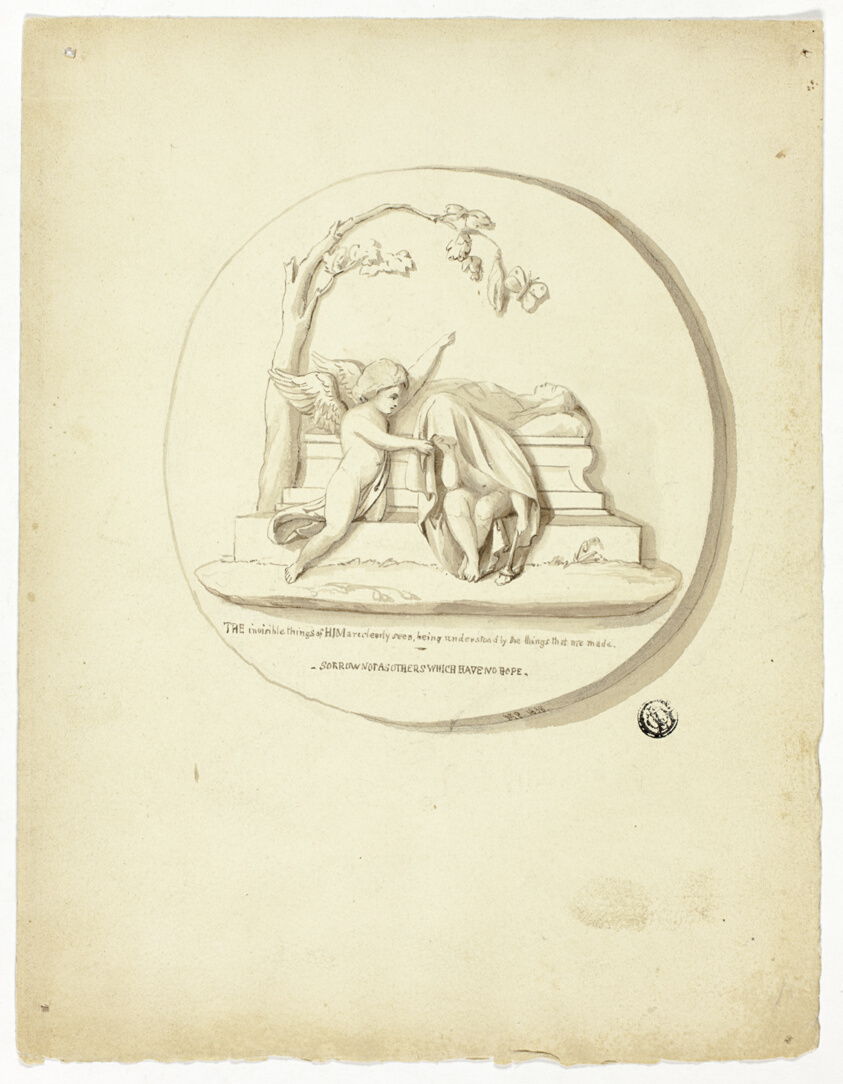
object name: Drawing and Watercolor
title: Medallion with Two Putti Beside Tomb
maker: Unknown artist (possibly British, 19th century)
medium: Pen and brown ink, with brush and brown wash, over touches of graphite, on cream wove paper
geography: United Kingdom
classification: ink or chalk wash; drawings (visual works); prints and drawing